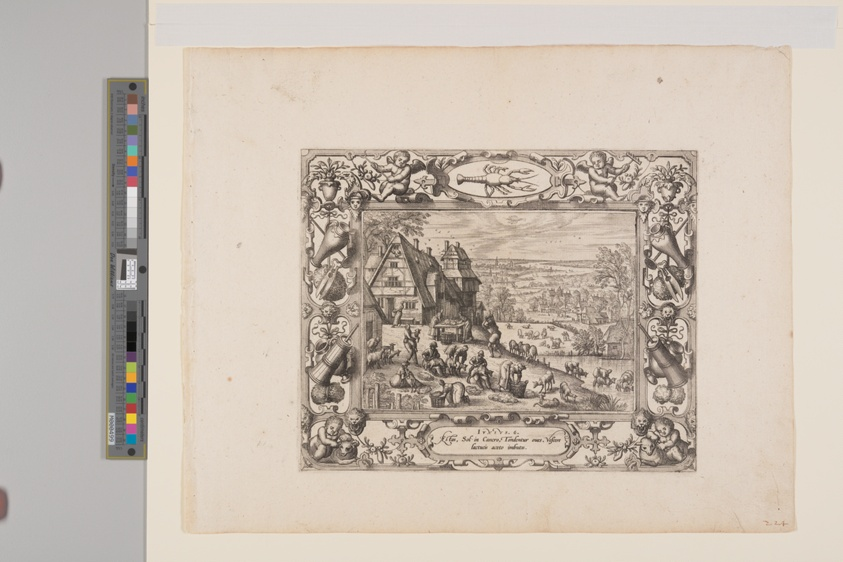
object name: Print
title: June, from The Twelve Months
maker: Pieter van der Borcht (Flemish, 1545–1608) [image]; Johannes van Doetecum (Netherlandish, 1528/32–1605) and Lucas van Doetecum (Dutch, died before 1584) [border]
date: c. 1574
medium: Etching from two plates on ivory laid paper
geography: Flanders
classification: etching; paper; print; prints and drawing